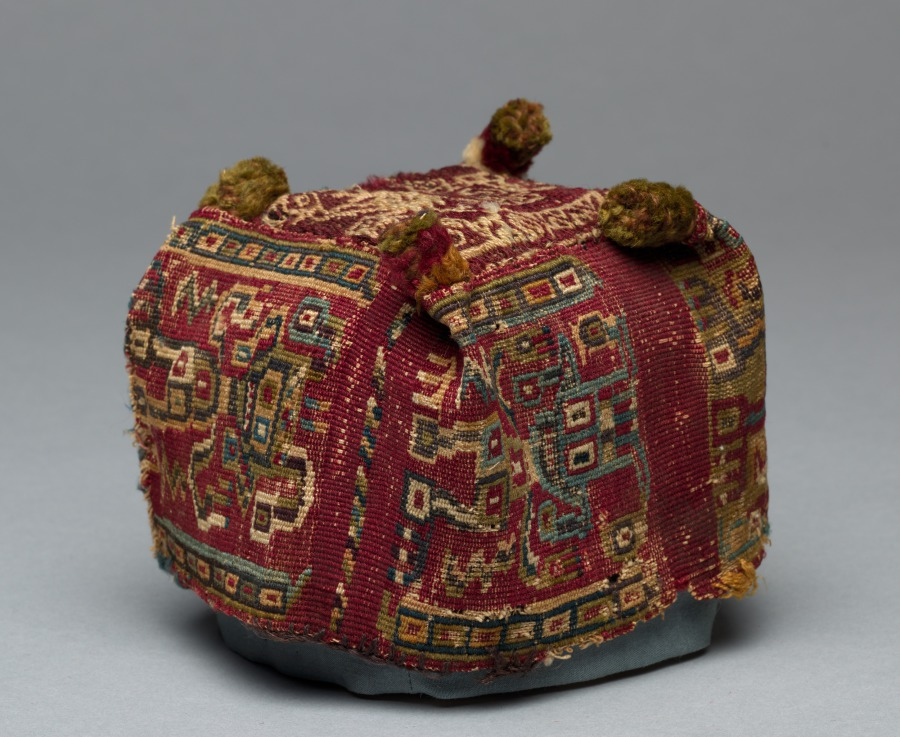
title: Four-Cornered Hat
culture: Peru, South Coast, Wari Culture, Middle Horizon, 8th-12th Century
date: c. 700–1100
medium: sides: cotton and wool plain cloth, brocaded; top: wool fancy cloth (?)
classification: Textile